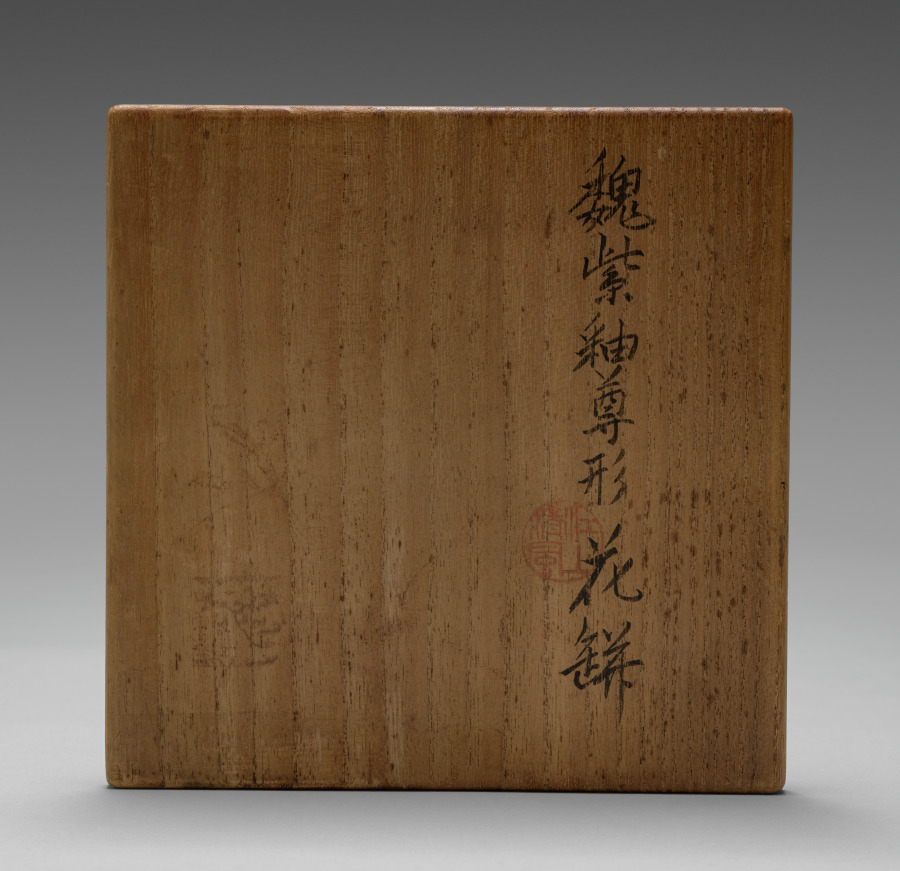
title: Gu-Shaped Vase with Patina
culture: Japan, Taishō period (1912–26) or Shōwa period (1926–89)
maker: Seifū Yohei IV (Japanese, 1872–1951)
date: 1914–46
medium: Porcelain with overglaze color enamel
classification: Ceramic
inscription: 清風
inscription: 成山清風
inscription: 清風造 【印】 清風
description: Yohei IV’s interest in bold, colorful designs is on full display in this purple gu-shaped vase. He not only exhibits his penchant for bold colors but also shows off a complex surface that suggests the patina on an ancient bronze. The body of the vase is a dark, greenish blue over which there is a thick application of color. While the predominant overlaid color is lavender purple, salmon pink and cornflower blue appear in places along with myriad nearly black forms, perhaps floating dandelion seeds or tiny flowers, scattered over the surface.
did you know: The glaze recalls in some respects a Chinese glaze named “snowflake blue,” or xuehualan (Japanese sekka’ai), a low-fired lead-fluxed glaze.